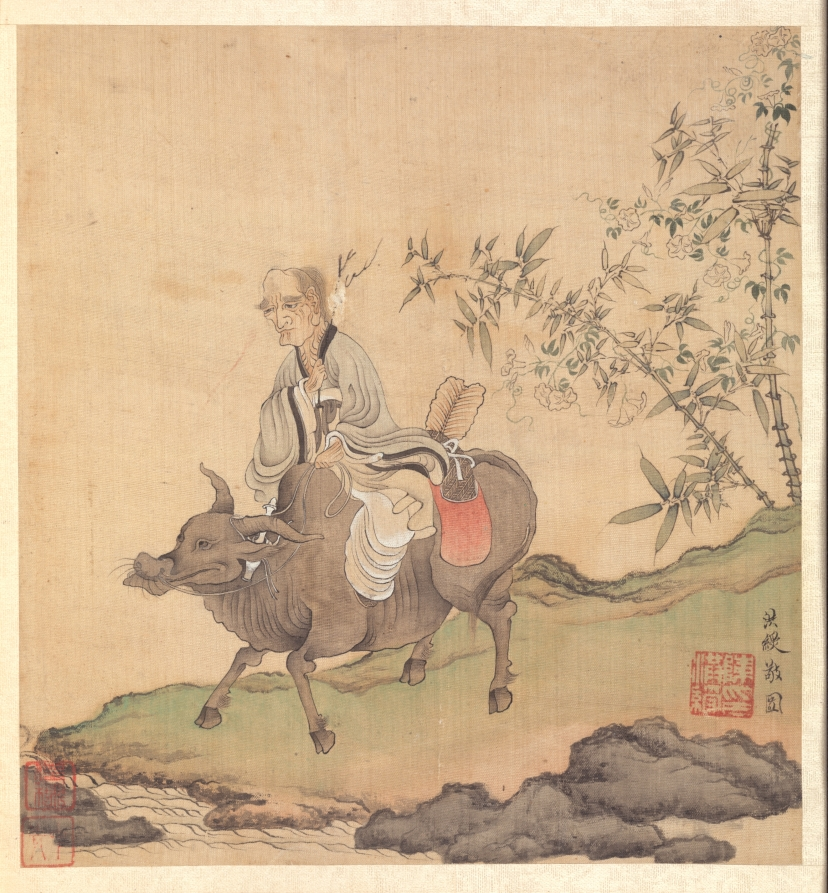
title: Paintings after Ancient Masters: Laozi Riding an Ox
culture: China, Ming dynasty (1368–1644)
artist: Chen Hongshou (Chinese, 1598/99–1652)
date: 1598–1652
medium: album leaf; ink and color on silk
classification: Painting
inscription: Hongshou respectfully painted. [Seal] Chen yin Hongshou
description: The twenty paintings in this double-album by Chen Hongshou include landscapes, figures, and flowers. It also has one leaf featuring a woman, an often-used subject not found in the other albums from the latter part of his career. His late works are wonderful summations of Chen's peculiar and quirky art--archaistic, hyper-refined--but without accompanying shallowness or sentimentality. His figures and landscapes in the late albums are miniaturized, not unlike the small Chinese gardens, or the carefully selected small table rocks or old roots used for contemplation to see the world in miniature. This loss of scale is quite deliberate and reflects the psychological situation of a depressed class like the Ming loyalist officials and scholars, deprived of their integrity and honor, and forced to lead a diminished and restricted existence.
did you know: Laozi was an ancient Chinese philosopher who wrote the Daodejing, the foundational text of Daoism.